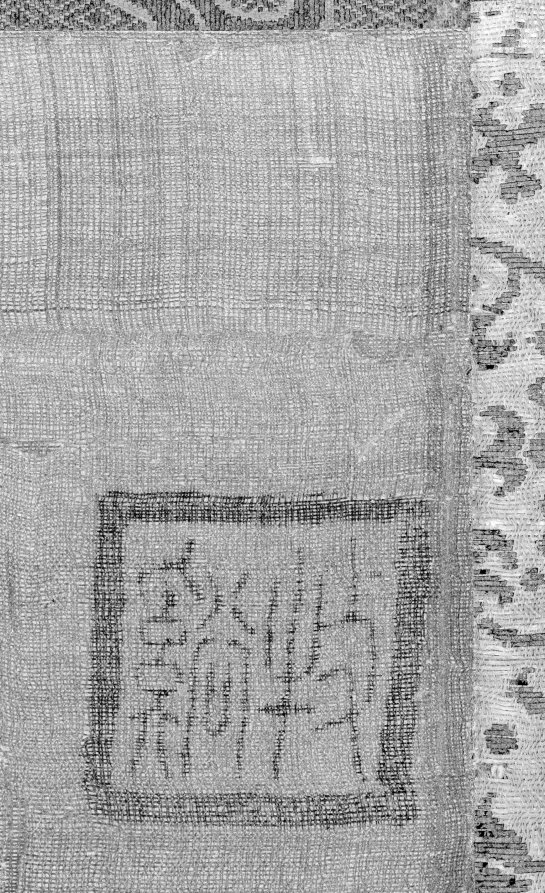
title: Dragon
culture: China, Southern Song dynasty (1127-1279)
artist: Fachang Muqi (Chinese, 1220–1280)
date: c. 1250–79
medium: Hanging scroll; ink on silk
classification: Painting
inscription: 道有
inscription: 雜華室印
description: The dragon and tiger are tied to the philosophical concept of yin and yang, which describes opposite but complementary forces. The dragon occupies a tiered background of waves and mist. Its luminous head emerges from the darker passages, and its narrow twisting body is serpent-like. By contrast, the close-up view of the tiger emphasizes its bulk. The tiger bends its head to lick its paw while its tail curls in the foreground. In their original Chan Buddhist context, this pair of scrolls likely flanked a central image, like the Bodhisattva Guanyin. The silk has darkened over the centuries, and the slight reddish shading in the tiger’s tongue and nose has faded.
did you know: Fachang Muqi was a Chinese Chan Buddhist monk and painter.